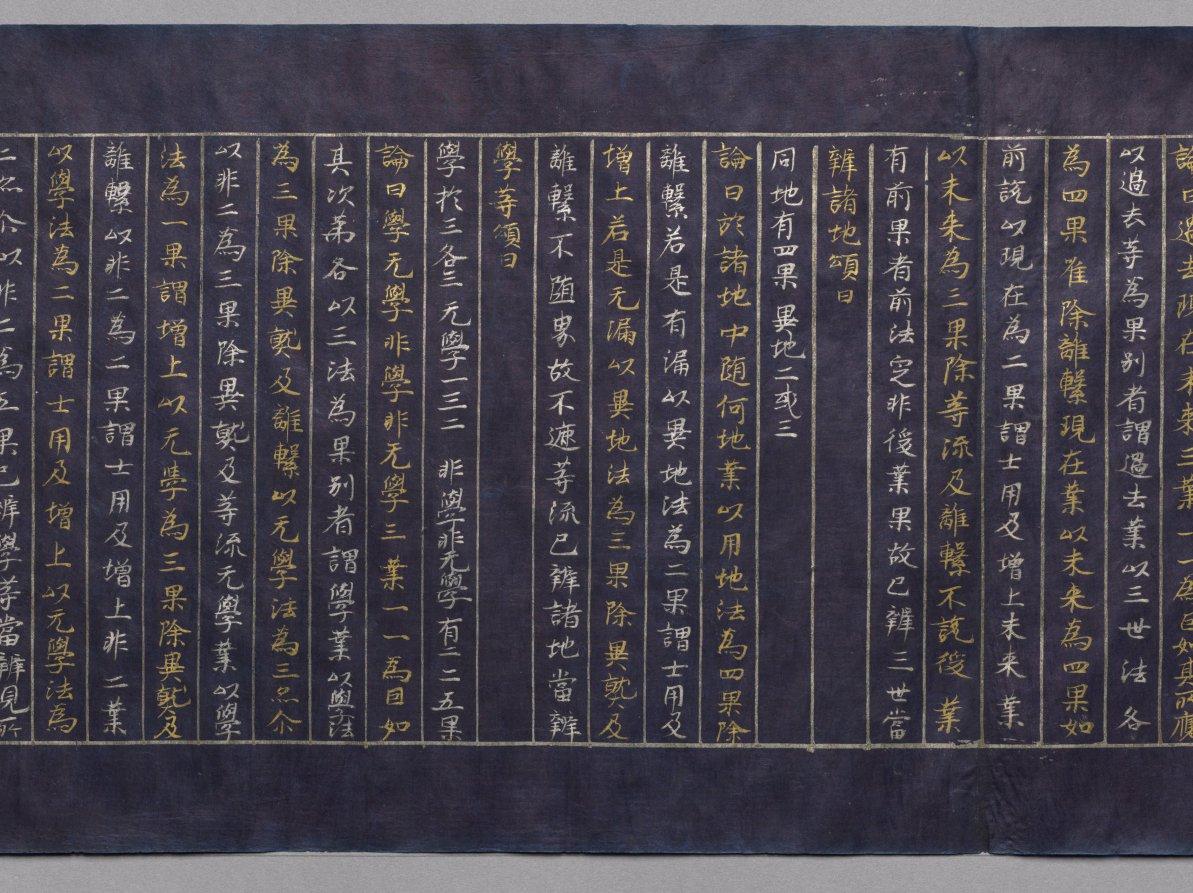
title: Meta-Discourse on the Teachings from the Treasury (Abidharmakosha-Bhashya)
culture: Japan, Heian period (794–1185)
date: 1100s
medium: handscroll; gold and silver on indigo-dyed paper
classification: Manuscript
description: This religious text relates some of the teachings of the great fourth-century Indian Buddhist scholar Vasubhandhu. The text analyzes human consciousness in its relationship to the environment and transformations that occur during meditation. This scroll is the 17th part of a 30-part translation of the text by Xuanzang, an eminent seventh-century Chinese monk.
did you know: The frontispiece depicts the Buddha Shakyamuni preaching in a paradisical landscape.